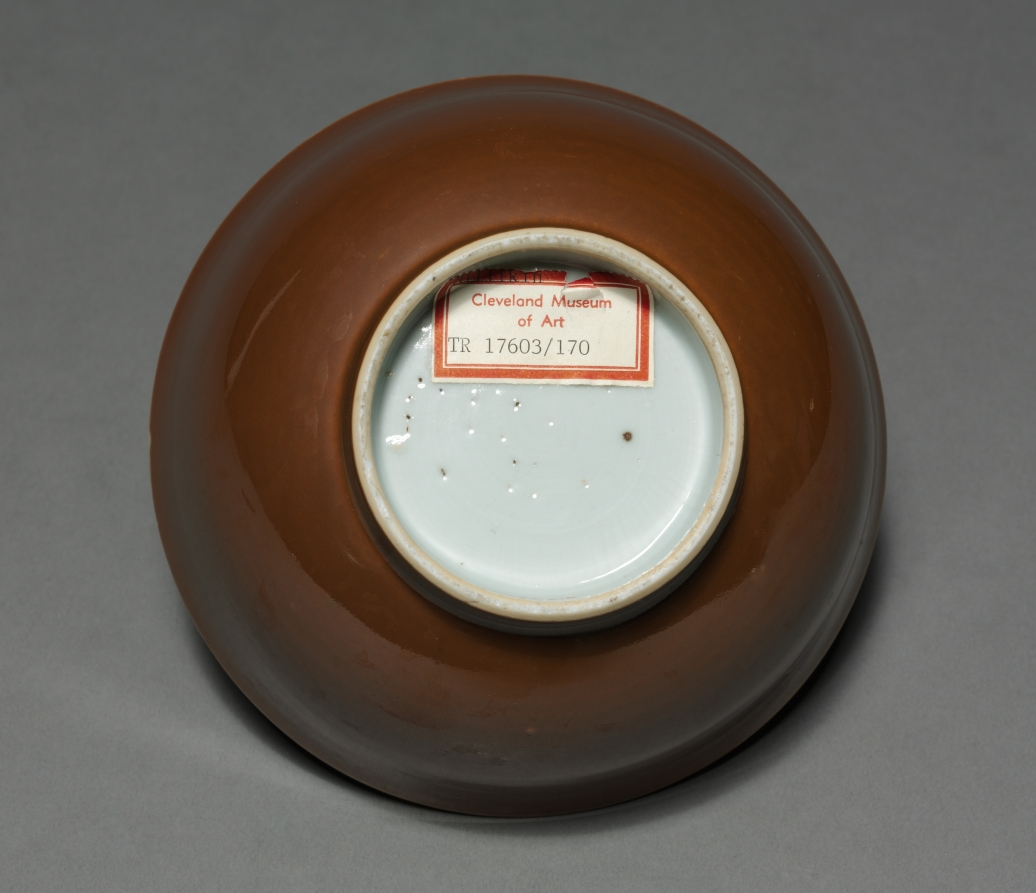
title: Bowl with Floral Sprays and Medallions with Figure in Landscape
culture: China, Jiangxi province, Jingdezhen kilns, Qing dynasty (1644-1911), Yongzheng mark and reign (1723-35)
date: 1723–35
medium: porcelain with underglaze blue decoration (interior) and café-au-lait glaze (exterior)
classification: Ceramic